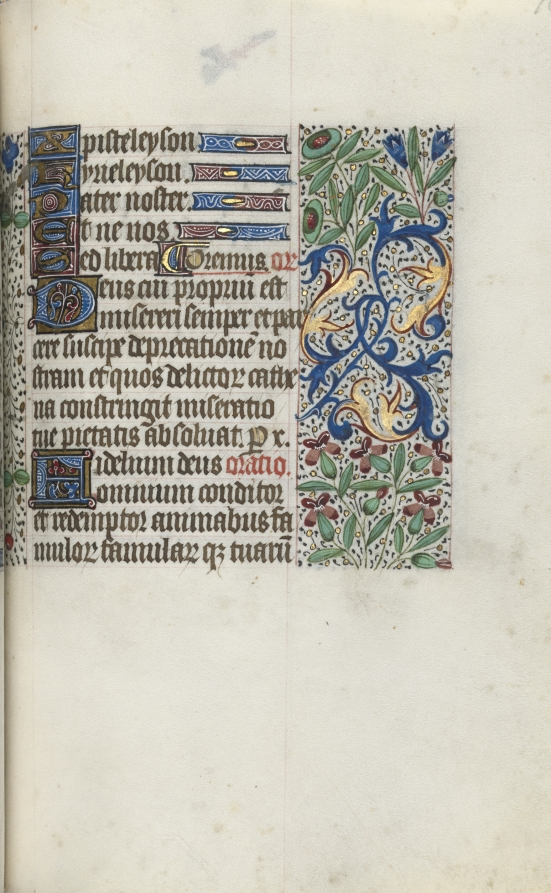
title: Book of Hours (Use of Rouen): fol. 96r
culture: France, Rouen, 15th century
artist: Master of the Geneva Latini (French, active Rouen, 1460–80)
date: c. 1470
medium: ink, tempera, and gold on vellum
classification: Bound Volume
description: In the late 1400s and early 1500s Rouen was an established and important center of book production. The city’s cathedral had a wealthy chapter that spent large sums of money to commission books and to maintain its extensive library. The stationers and booksellers would have likely been concentrated in or near the cathedral precinct. This artist, named after a manuscript now in Geneva, was Rouen’s principal illuminator during the second half of the 1400s.